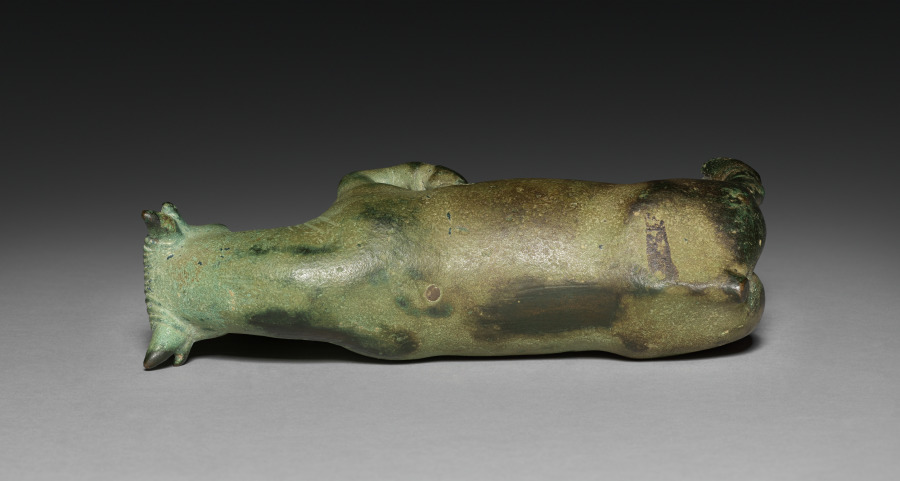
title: Pawing Bull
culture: South Italy, Lucania, Greek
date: 500–475 BCE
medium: bronze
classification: Sculpture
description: With its head slightly lowered and right foreleg raised in a pawing motion, this robust bull seems poised for action. The pose closely resembles that of bulls on coins minted at Thurii, a Greek colony in South Italy, but the statuette seems earlier in date and could have other associations. Perhaps the bull once carried the princess Europa, for example, or battled a lion or a hero. Alternatively, it may have stood alone as a small-scale offering, representing the actual bulls sometimes sacrificed to deities.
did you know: This solid-cast bronze bull is nearly intact, missing only its tail.